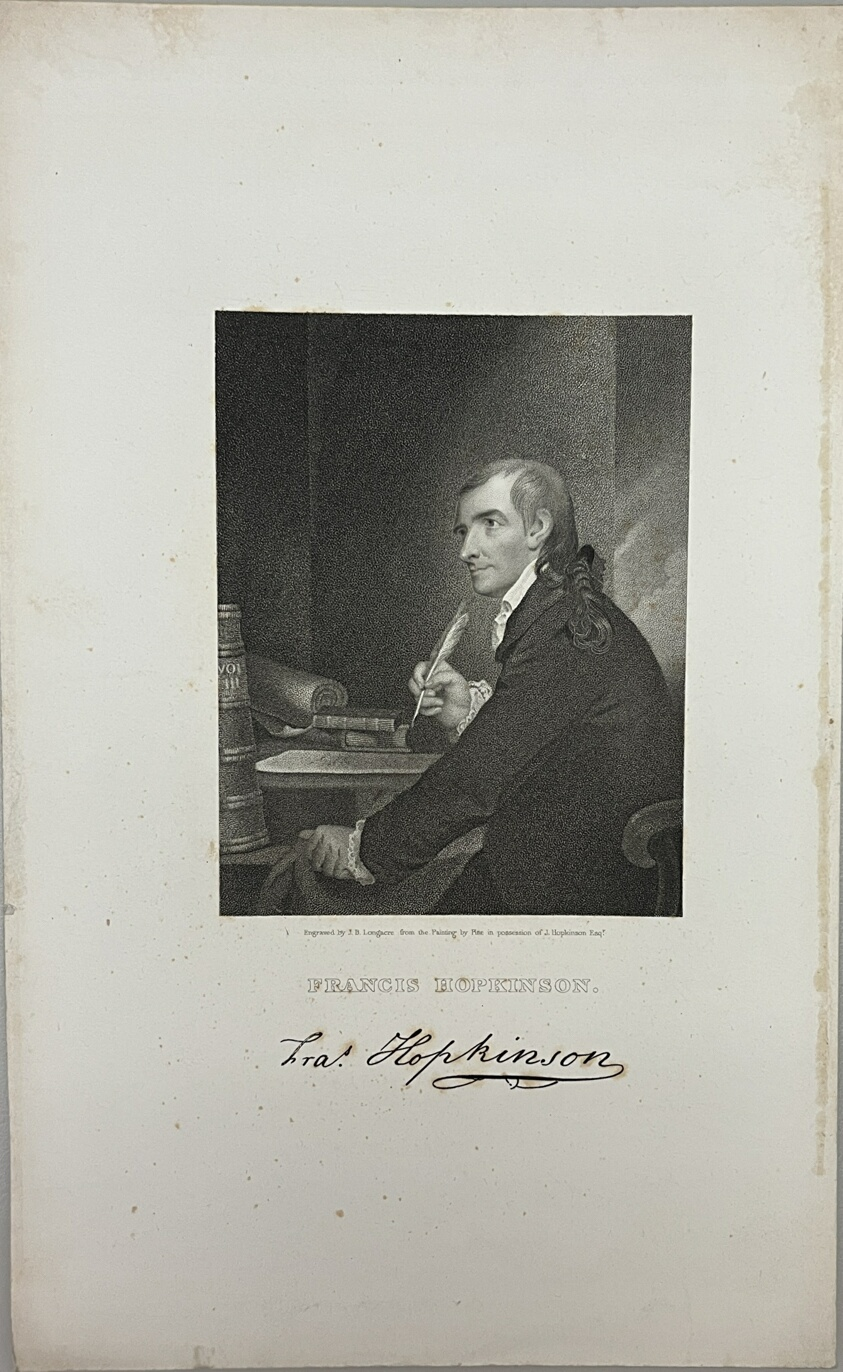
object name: Print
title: Francis Hopkinson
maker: James Barton Longacre (American, 1794-1869); and J.H. Nesmith (likely American, 19th century); after Robert Edge Pine (British, 1742-1788)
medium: Stipple engraving on paper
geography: United States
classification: reproduction; print; prints and drawing